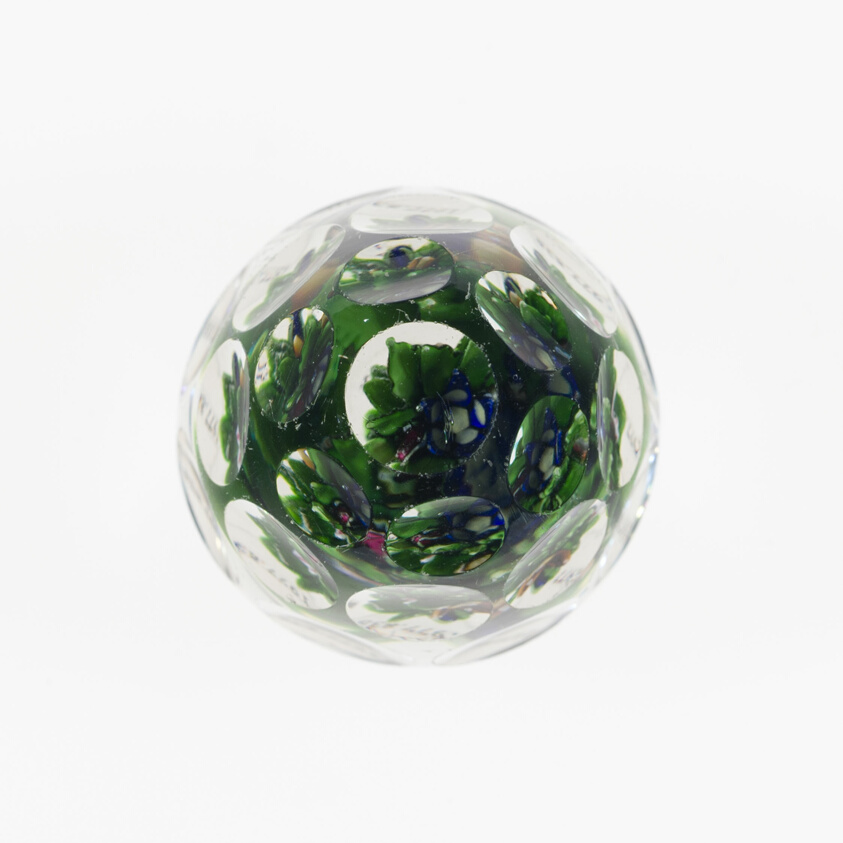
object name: Glass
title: Paperweight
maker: American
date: c. 1848–55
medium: Glass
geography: United States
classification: paperweight; lampwork; glass; european decorative arts